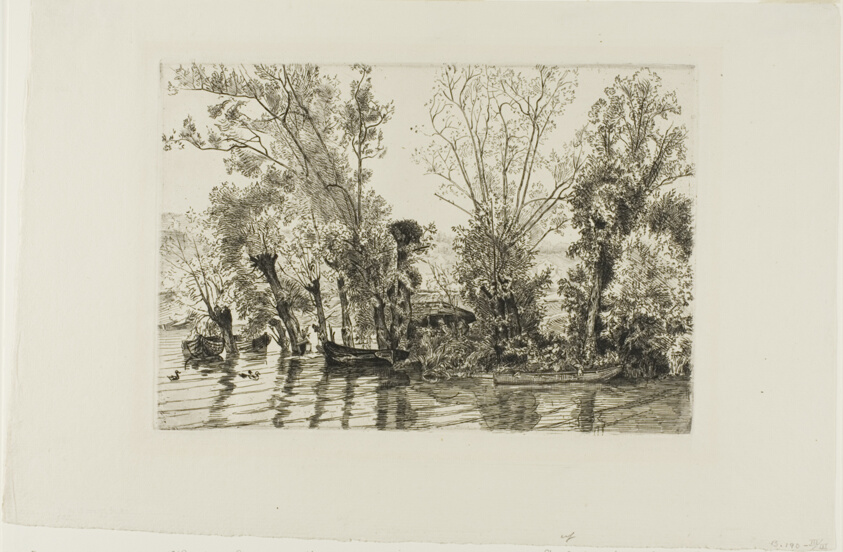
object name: Print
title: The Willows at Mottiaux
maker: Felix Bracquemond; French, 1833–1914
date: 1868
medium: Etching on cream laid paper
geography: France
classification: etching; print; prints and drawing